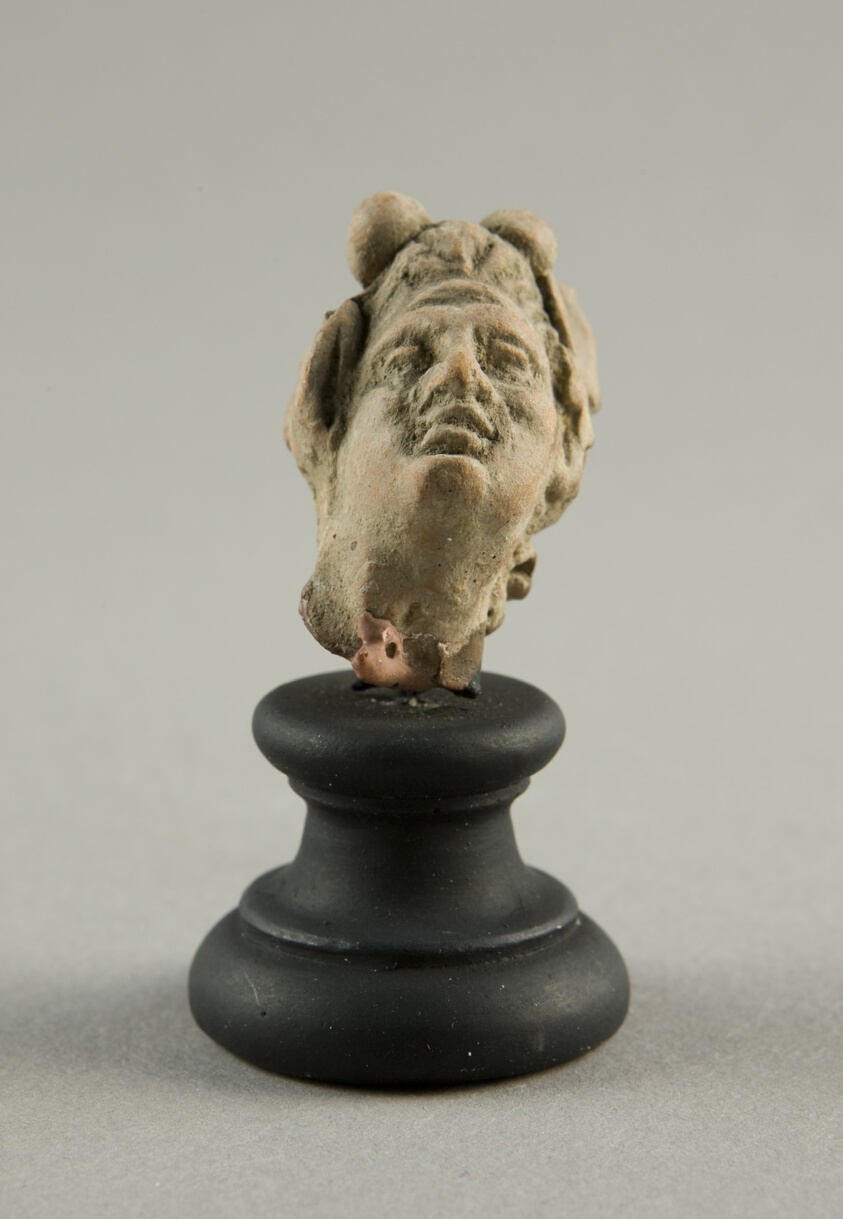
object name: Sculpture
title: Head of a Man with Furrowed Brow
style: greek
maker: Greek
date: 2nd-1st century BCE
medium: terracotta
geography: Greece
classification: earthenware; ceramics; sculpture; ancient art